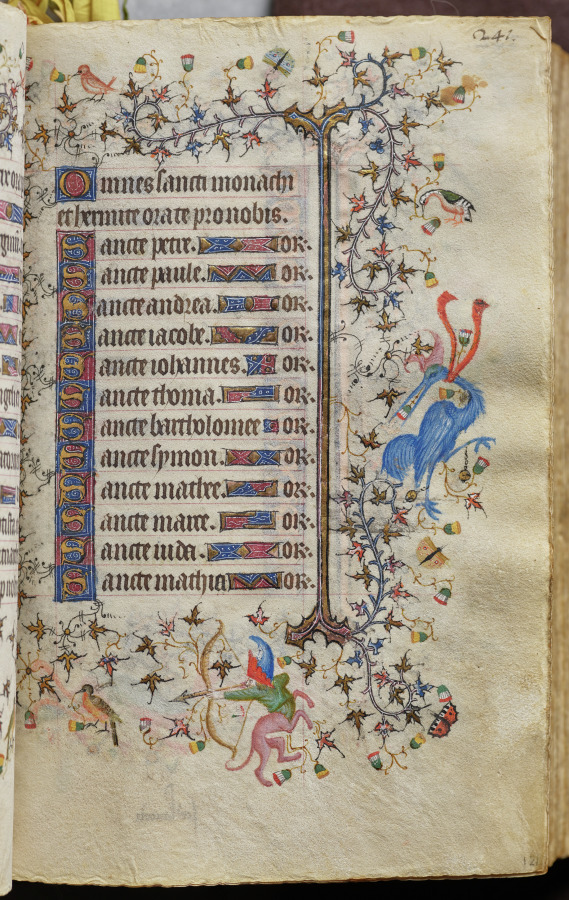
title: Hours of Charles the Noble, King of Navarre (1361-1425): fol. 121r, Text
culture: France, Paris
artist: Master of the Brussels Initials and Associates (French)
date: c. 1405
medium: ink, tempera, and gold on vellum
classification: Bound Volume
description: This precious volume was obviously highly prized by its owner, the French-born King of Navarre, who had his coat of arms painted on no less than twenty folios. Rather than directly commissioning this manuscript from a specific workshop, it seems that Charles the Noble acquired his book of hours -- perhaps ready-made for the luxury market -- while on a trip to Paris in 1404-05. A collaborative effort, six painting styles are evidenced within the pages of this codex, those of two Italians, two Frenchmen, and two Netherlanders. The painter who was responsible for the planning and decoration of the book, and who produced seventeen of the large miniatures, was a Bolognese artist known as the Master of the Brussels Initials. His principal assistant, responsible for most of the borders, was a Florentine who signed his name "Zecho" da Firenze on folio 208 verso.